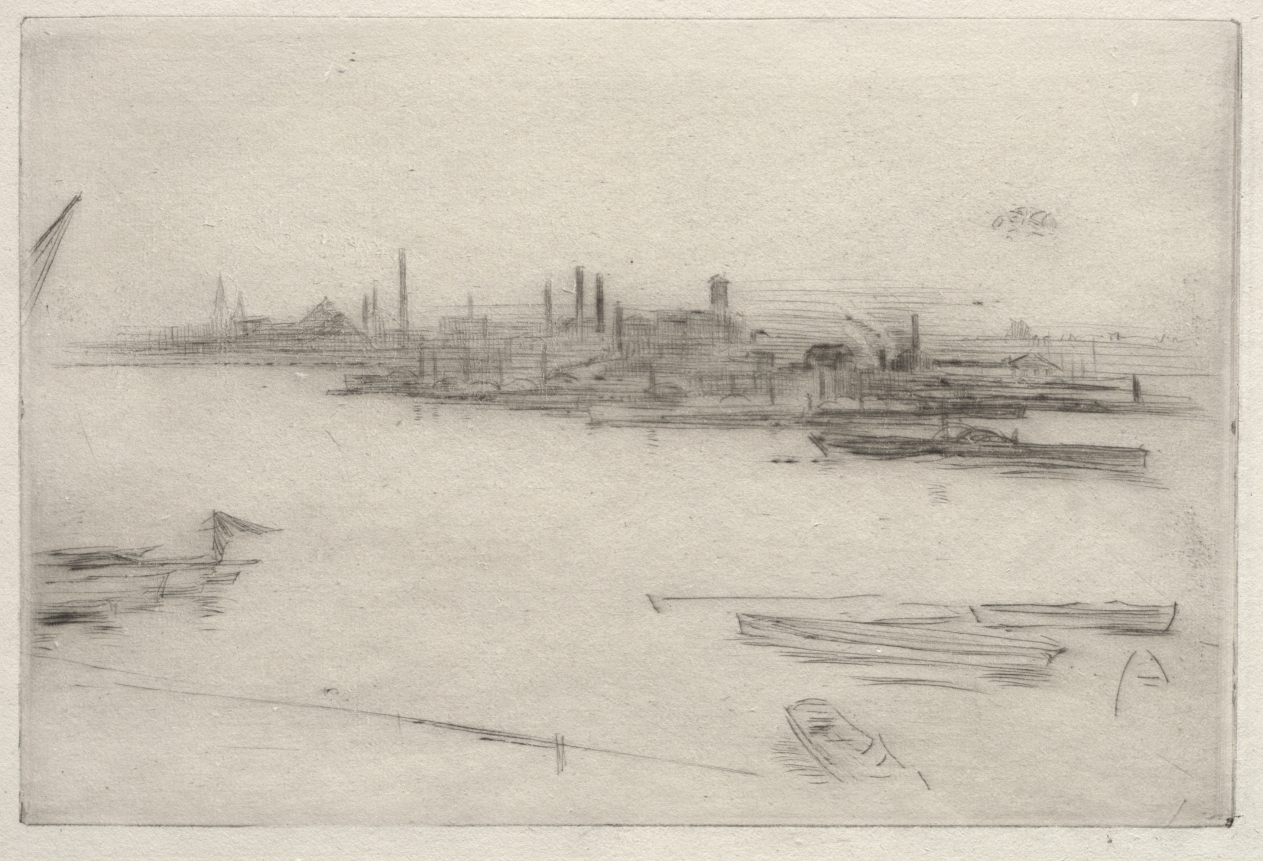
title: Battersea: Dawn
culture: America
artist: James McNeill Whistler (American, 1834–1903)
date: 1877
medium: drypoint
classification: Print